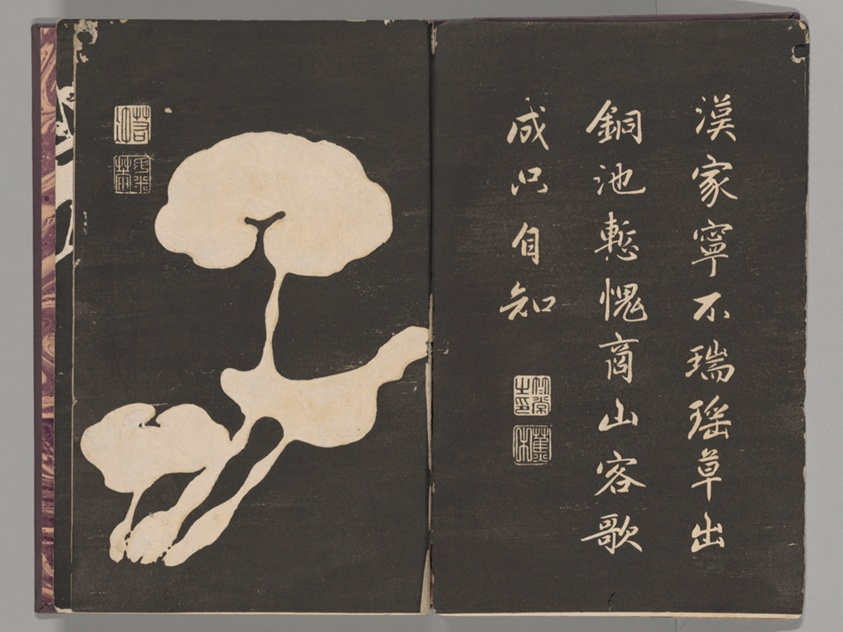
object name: Book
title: Soken sekisatsu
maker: Ito Jakuchu (Japanese, 1716-1800)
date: 1767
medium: Woodblock printed book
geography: Japan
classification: book